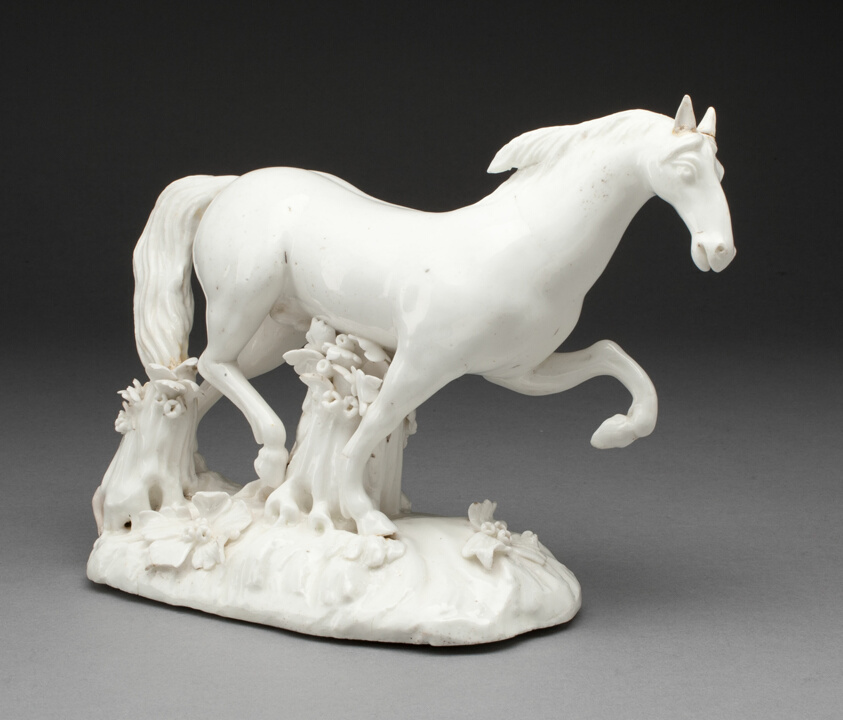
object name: Ceramics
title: Horse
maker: Vincennes Porcelain Manufactory; French, 1740-1756 (known as Sèvres from 1756)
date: c. 1750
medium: Soft-paste porcelain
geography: Sèvres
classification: sculpture; porcelain; european decorative arts; ceramics